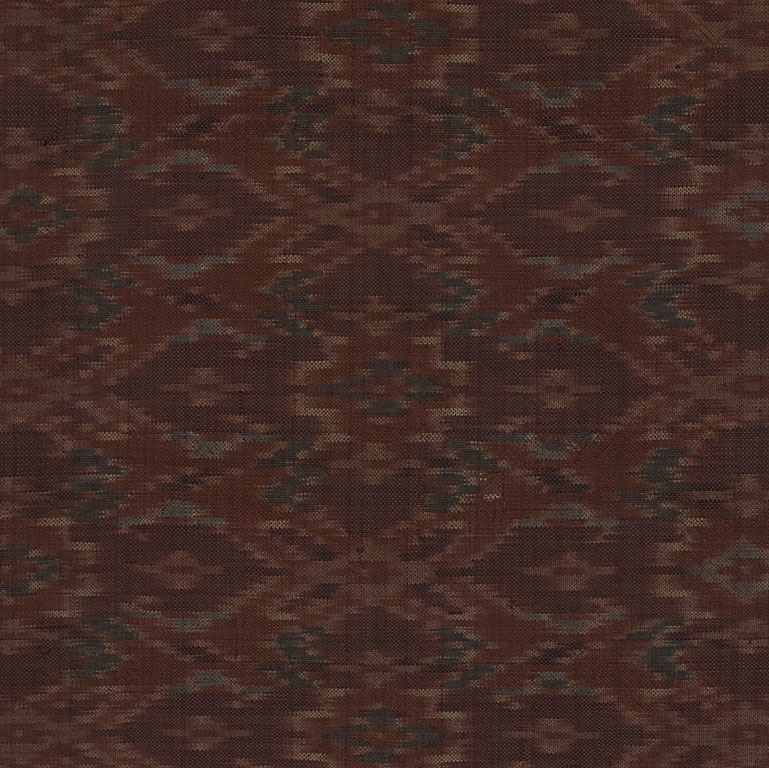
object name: Textile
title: Woman's Selendang Limar (Shoulder Cloth)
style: 19th century, indonesian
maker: Palembang area, south Sumatra, Indonesia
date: Late 19th century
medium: Silk and gold-leaf-over-lacquered-paper-strip-wrapped silk, weft resist dyed (weft ikat), plain weave with supplementary patterning wefts; embroidered with silk in satin, single satin, and stem stitches; embellished with gold spangles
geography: Indonesia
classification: textile; needlework (visual works); costume accessory; garment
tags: paisley, floral